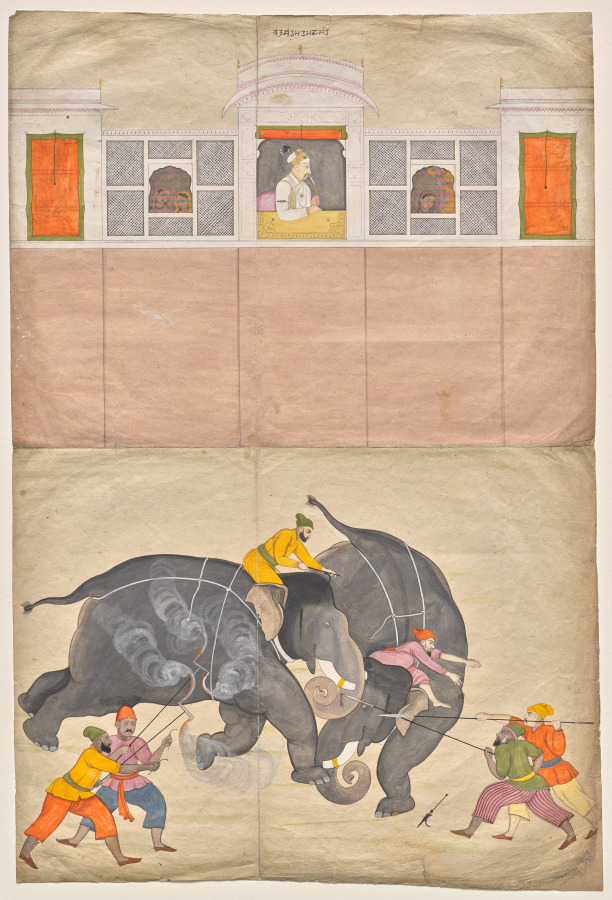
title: Two Elephants Fighting in a Courtyard Before Muhammad Shah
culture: Northern India, Himachal Pradesh, Guler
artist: attributed to Nainsukh (Indian, 1710–1778)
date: c. 1730–40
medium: Gum tempera, ink, and gold on paper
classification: Painting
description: The Mughal emperor responsible for a revival of courtly arts and pastimes was Muhammad Shah (reigned 1719–48). This painting was made by an artist from a small kingdom in the western Himalayas who stayed at the Mughal court in Delhi and painted scenes of his experiences. Like his predecessors, Muhammad Shah enjoyed watching elephant fights. He is shown in his window of public audience, marked by a golden carpet, smoking a hookah. Women from his harem can be seen looking on from behind painted screens. Two pairs of men hold fire brands and spears to prevent the elephants from running off and to keep them under control. The intensity of the fight—captured at a moment when one mahout, or elephant trainer, has dropped his goad and is about to jump off—is augmented by the dense colors and forms in contrast to the otherwise pale planes, balanced only by the strip of palace windows.